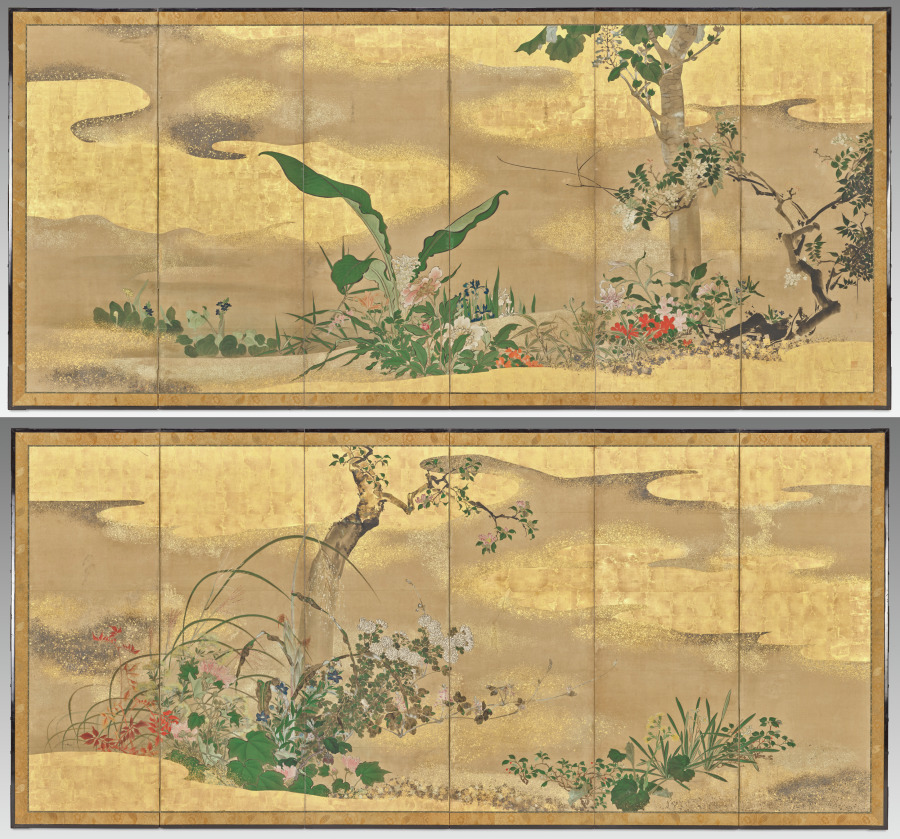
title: Flowers and Trees of the Four Seasons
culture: Japan, Edo period (1615–1868)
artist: Watanabe Shikō (Japanese, 1683–1755)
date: early to mid-1700s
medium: Pair of six-panel folding screens; ink, color, gold, silver, and gilding on paper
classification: Painting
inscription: 始興之印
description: The painter Watanabe Shikō had a special interest in scientific realism, based on interactions with his patron Konoe Iehiro. Shikō combined his attention to accurate depiction of plants with strong ink outlines and decorative elements like gold and silver, arriving at an innovative style that influenced many of his peers in the city of Kyoto.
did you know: One plant in these screens, tumeric, or ukon in Japanese, is found in Okinawa.